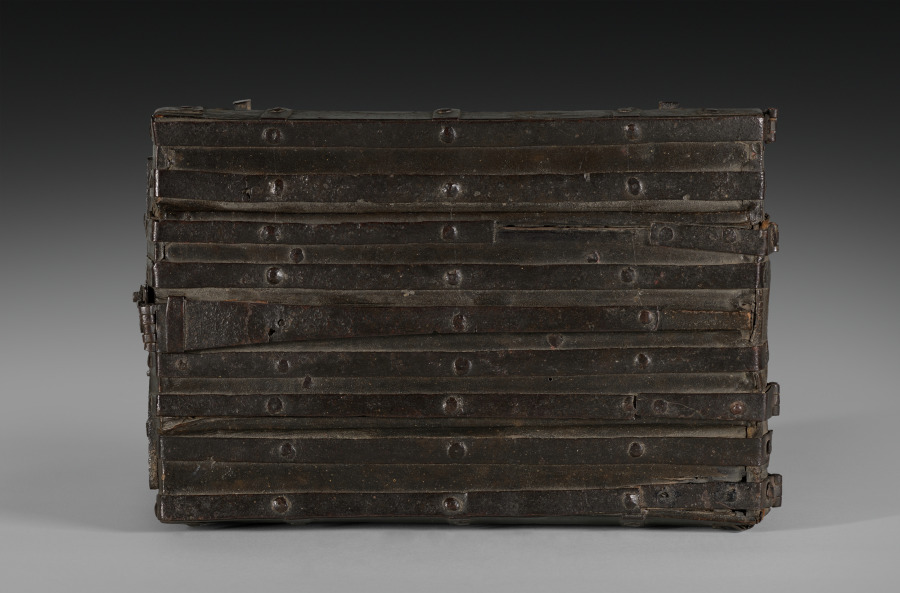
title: Coffret with Woodcut of Saint Veronica's Vernicle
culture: Coffret: France, probably Paris; Woodcut: Germany, Augsburg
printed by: Hans Burgkmair the Elder (German, 1473–1531)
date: Coffret: c. 1515; Woodcut: c. 1509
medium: Wood, leather, iron, textile, woodcut with stenciled coloring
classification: Print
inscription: SALVE. XPI. EFFIGIES. SACERRI[M]A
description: This remarkable object is thought to have functioned as a traveling case to keep small valuables and books, as well as a provisional altar. Made in France around 1515, the interior lid is affixed with a devotional woodcut made in Germany, imported, and colored for the purpose. Featuring an image of the veil of Saint Veronica, the text at the bottom of the woodcut guides the user in prayer to the holy image of Christ’s face which has been miraculously imprinted on the veil, an action that held promise of indulgences (a reduction in one’s punishment for sins). Presumably, the owner carried the box on a journey, retrieved a prayer book from inside, and propped it open in order to practice daily prayers.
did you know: A secret compartment on the top lid of this coffer may have held a relic, consecrated host, or valuable document.